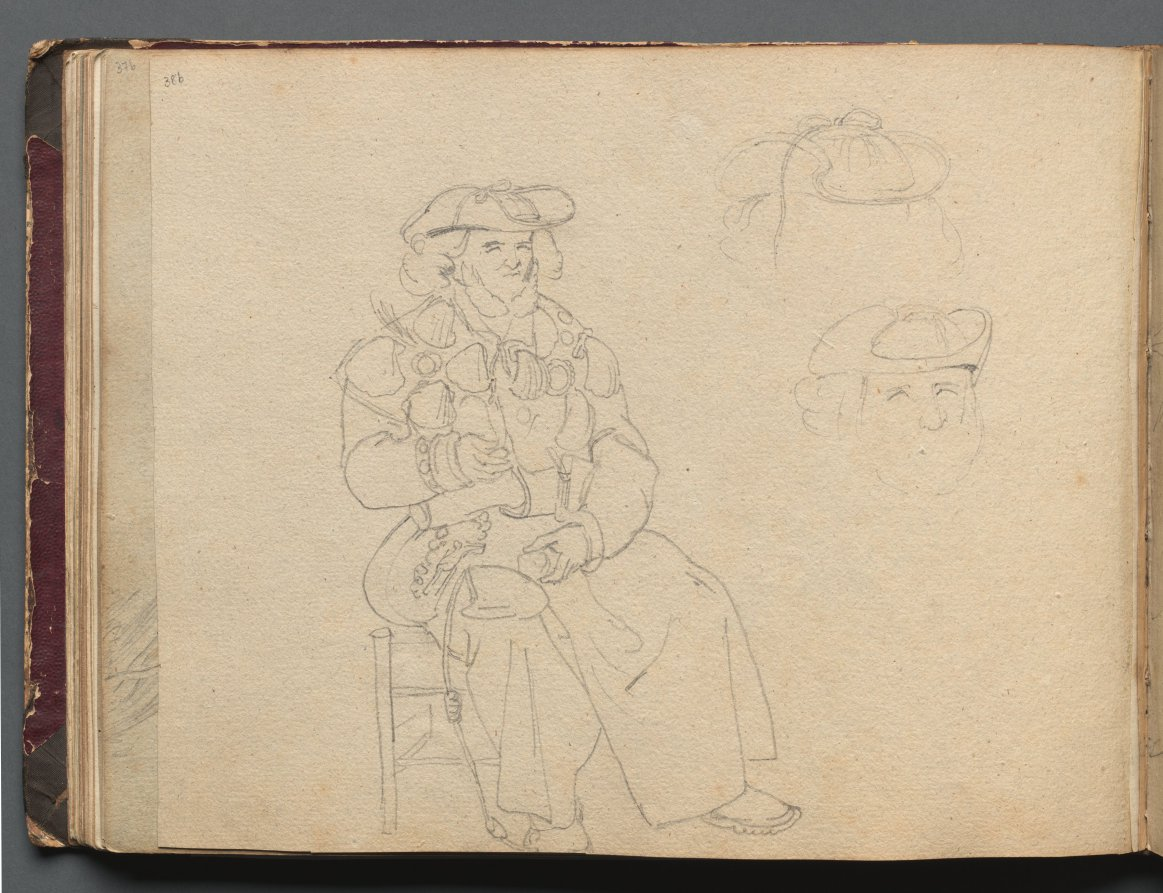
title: Album with Views of Rome and Surroundings, Landscape Studies, page 38b: Figure Study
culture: Germany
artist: Franz Johann Heinrich Nadorp (German, 1794–1876)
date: c. 1830s-70s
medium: graphite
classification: Bound Volume